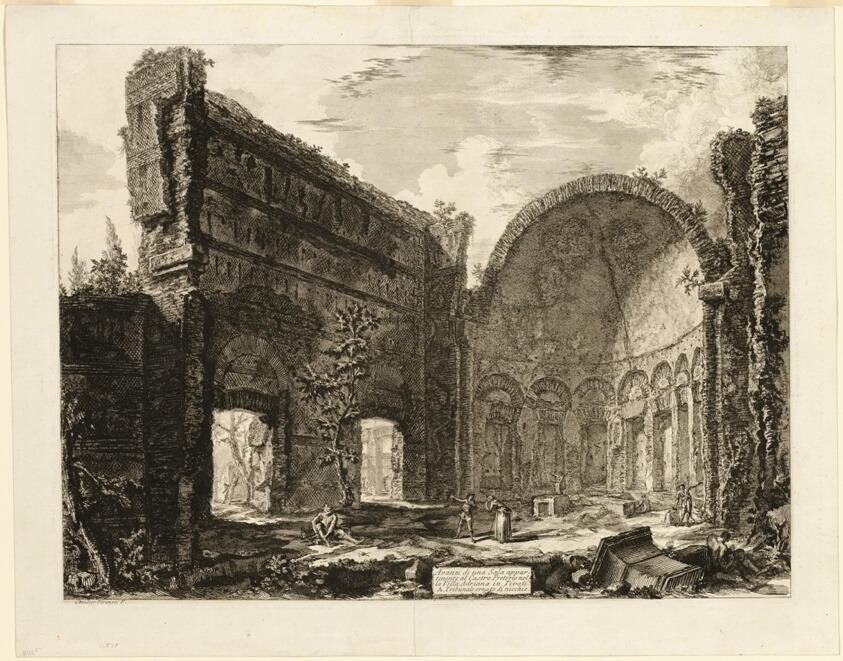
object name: Print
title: Remains of a room belonging to the Praetorian Fort at Hadrian's Villa, Tivoli, from Views of Rome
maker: Giovanni Battista Piranesi (Italian, 1720-1778); published by Francesco (Italian, 1758-1810) and Pietro Piranesi (Italian, born 1758/59)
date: 1774, published 1800–07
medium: Etching on heavy ivory laid paper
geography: Italy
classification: etching; print; prints and drawing